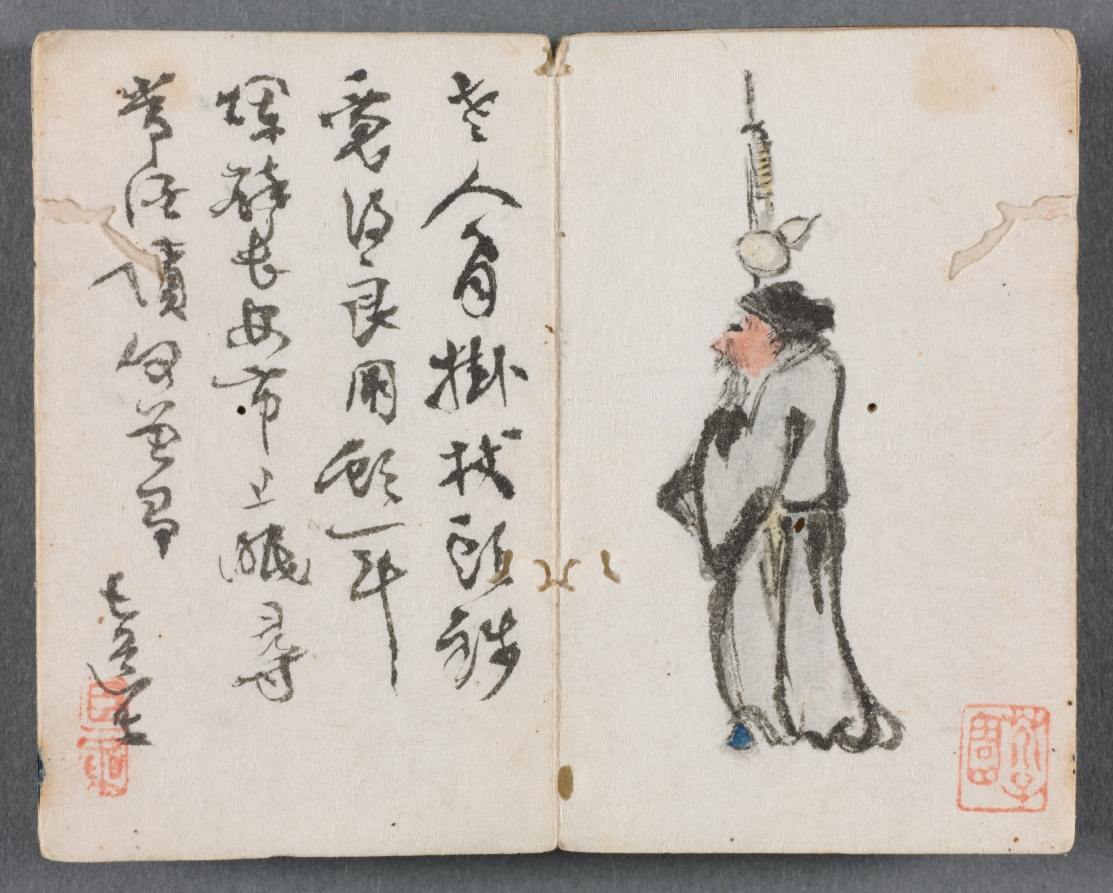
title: Miniature Album with Figures and Landscape (Man with Staff)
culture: China, Qing dynasty (1644–1911), Qianlong reign (1736–95)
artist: Zeng Yandong (Chinese, c. 1751–1827)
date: 1822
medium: album leaf, ink and color on paper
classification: Painting